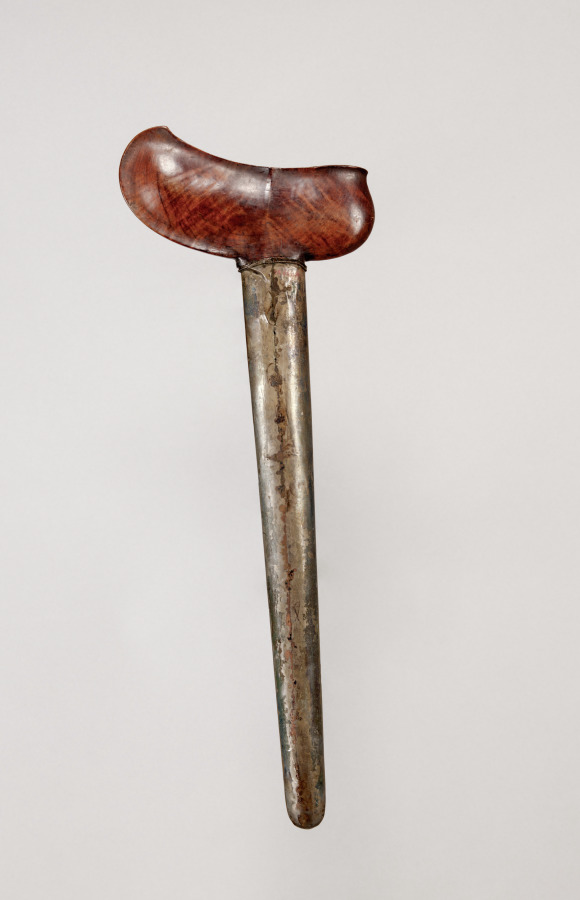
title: Wooden Scabbard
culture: Java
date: 1800s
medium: iron and silver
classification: Arms and Armor